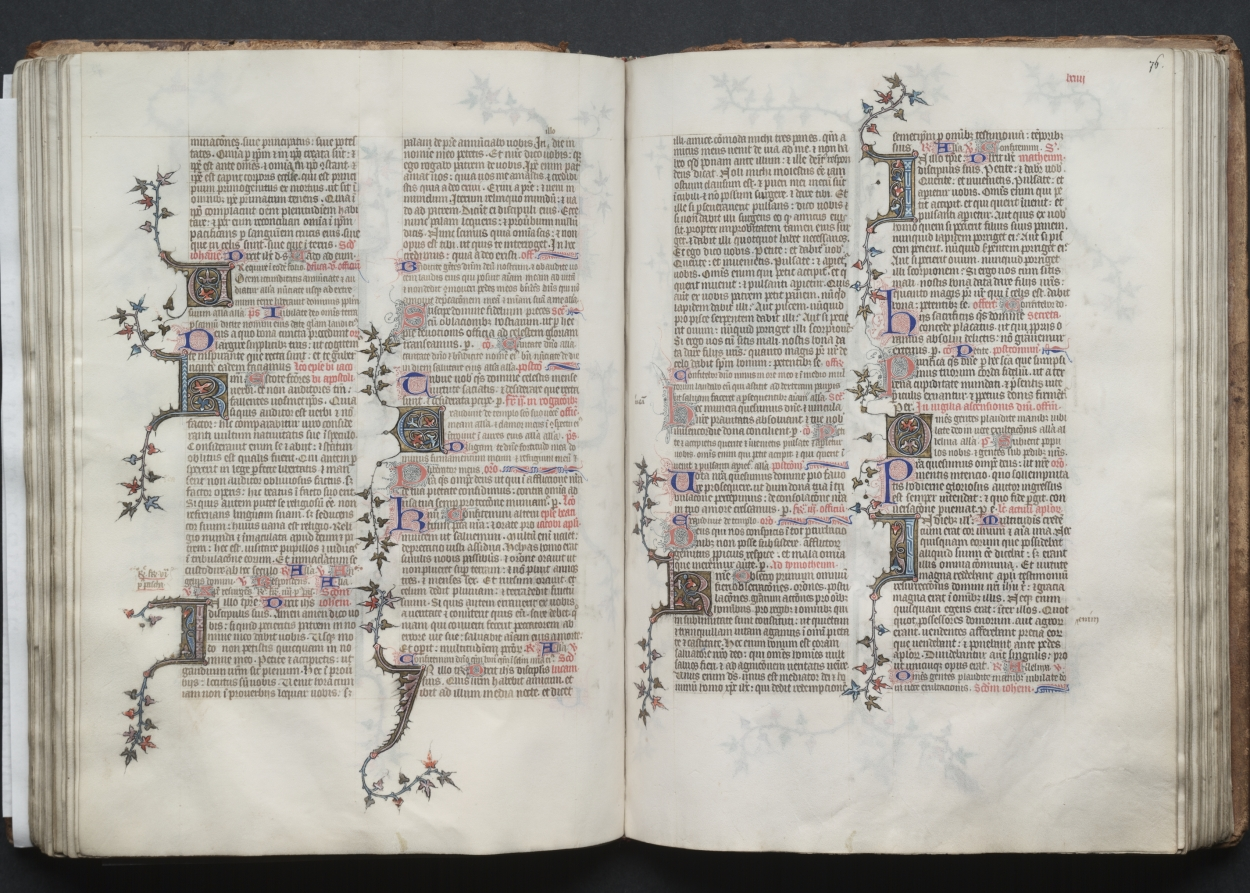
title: The Gotha Missal: Fol. 76r, Text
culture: France, Paris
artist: Master of the Boqueteaux (French)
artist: and Workshop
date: c. 1375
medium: ink, tempera, and gold on vellum; blind-tooled leather binding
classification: Bound Volume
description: The style and quality of this manuscript's decoration is typical of deluxe Parisian books made for aristocratic or royal patrons. Most of the book's decoration appears to be the work of the Master of the Boqueteaux, an artist active at the court of King Charles V (died 1380). His style was apparently shared by a number of book illuminators working in and around Paris. It is very possible that the Gotha Missal belonged to Charles V, but is not provable because the manuscript has no royal portraits and lacks a colophon. Given the book's magnificent decoration, however, it would seem that it was produced for a Valois prince, if not for the king himself. The manuscript receives its name from the German dukes of Gotha, its later owners.